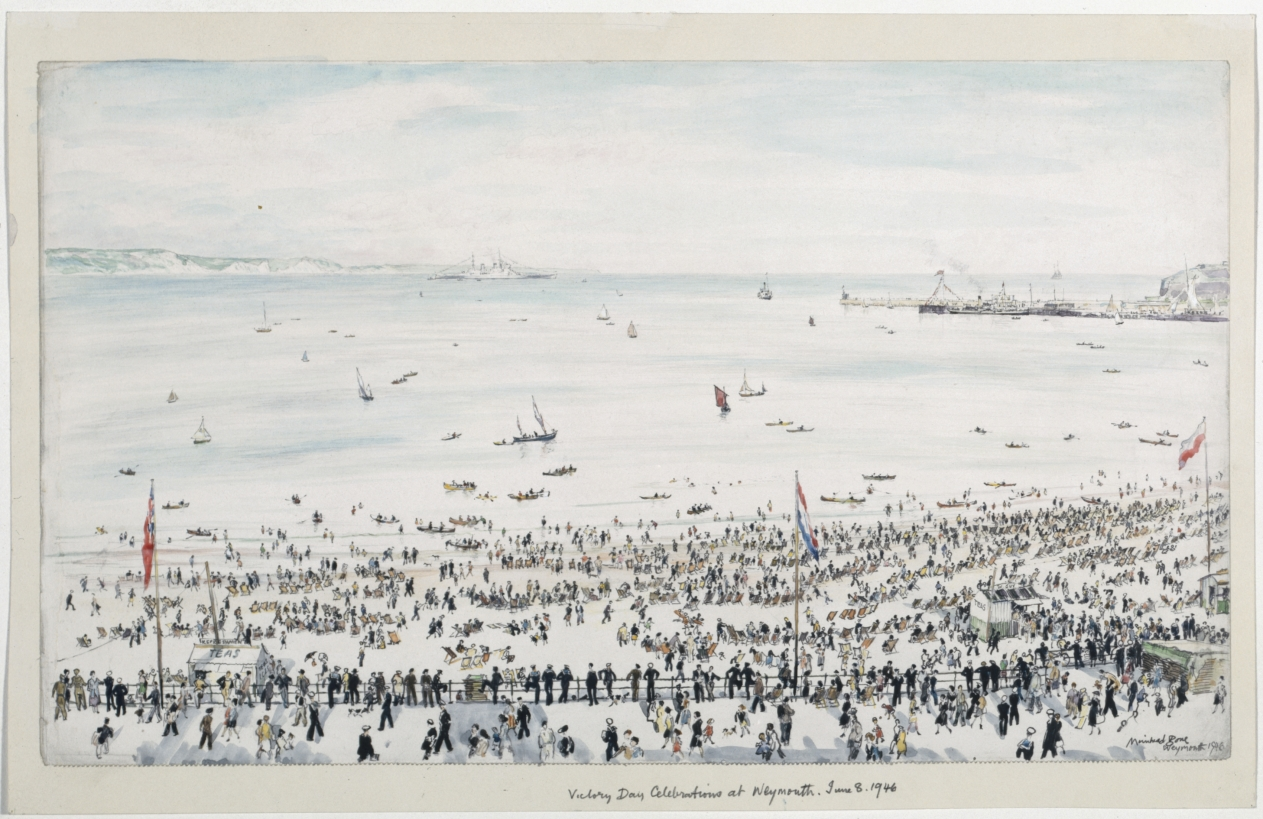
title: Weymouth Bay, Victory Day Celebrations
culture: England, 20th century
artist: Muirhead Bone (British, 1876–1953)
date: 1946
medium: watercolor, graphite, pen and ink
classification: Drawing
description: Hundreds of British beachgoers in Weymouth Bay celebrate the first anniversary of Victory Day, marking the Allies' victory against Germany in May 1945. This colorful depiction highlights the electrified mood of the population. Sir Muirhead Bone served as the official war artist during World War II. Having been appointed in 1916, Bone captured this happy moment after having lived through two world wars.